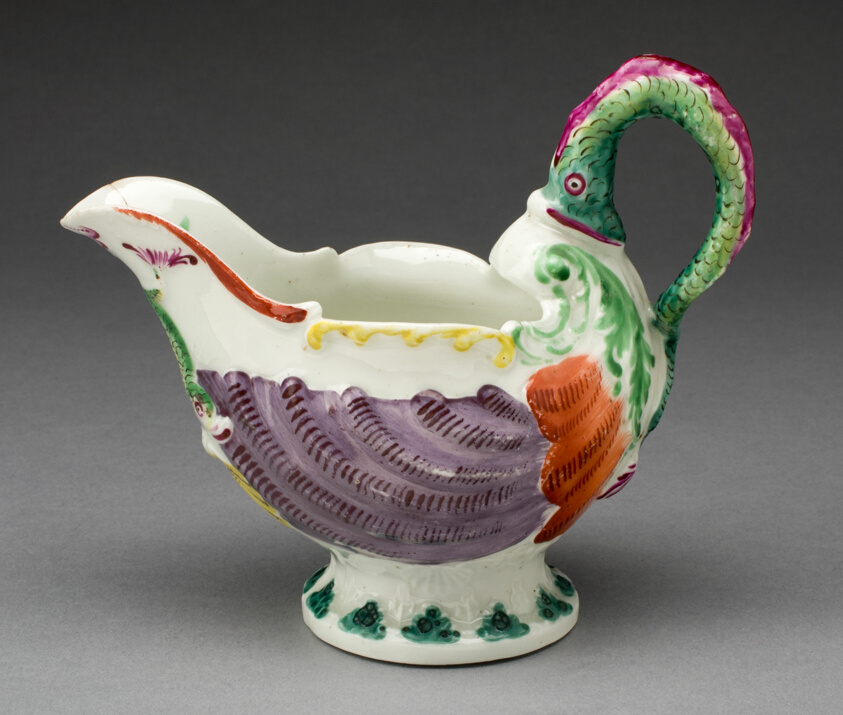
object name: Ceramics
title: Cream Boat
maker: Worcester Porcelain Factory (Warmstry House Period, 1751–1783); Worcester, England, founded 1751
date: c. 1765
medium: Soft-paste porcelain with polychrome enamels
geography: Worcester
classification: ceramics; teaware; porcelain; european decorative arts